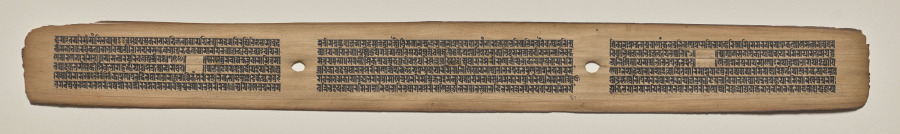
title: Text, Folio 33 (recto), from a Manuscript of the Perfection of Wisdom in Eight Thousand Lines (Ashtasahasrika Prajnaparamita-sutra)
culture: Eastern India, Bihar, Vikramashila Monastery. Painting: Nepal, Kathmandu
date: Sunday, September 14, 1119 (year 239 of the Newar Samvat in the month of Ashvina)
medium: gum tempera and ink on palm leaves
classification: Painting